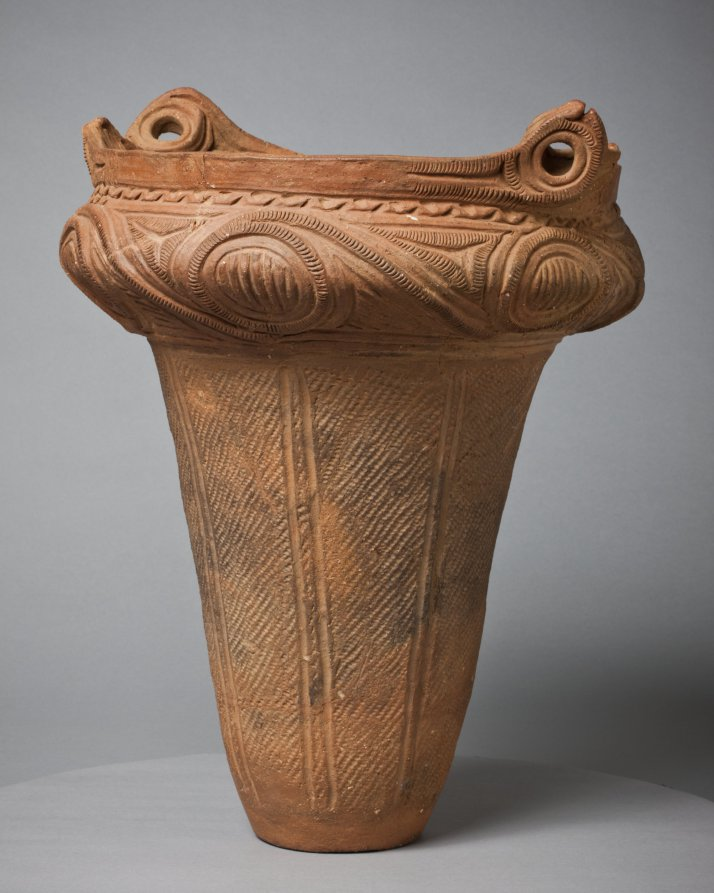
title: Urn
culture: Japan, Jōmon period (c. 10,500–300 BCE)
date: c. 2000 BCE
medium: earthenware, terracotta, impressed and incised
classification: Ceramic